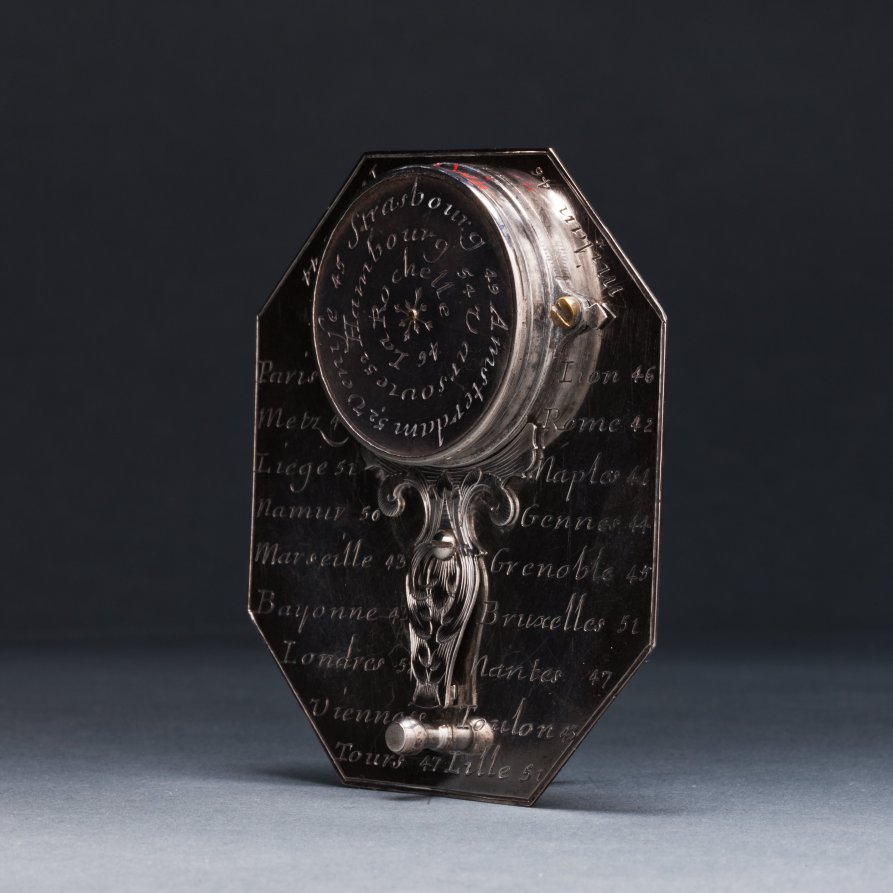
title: Butterfield Sundial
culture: France, 18th century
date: 1700s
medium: silver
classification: Silver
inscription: [Engraved signature above the compass in ribbon band]: "N. BION A Paris"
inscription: [Engraved on the face of the sundial]: “Pour 55° 4-5-6-7-8-9-10-11 50° IIII-V-VI-VII-VIII-IX-X-XI 45° 5-6-7-8-9-10-11 40° -VI-VII-VIII-IX-X-XI'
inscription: [Engraved on the other side]: "Pour 55° -8-7-6-5-4-3-2-1-0 50°-VIII-VII-VI-V-IIII-III-II-I 45°-8-7-6-5-4-3-2-1 40°-VII-VI-V-IIII-III-II-I"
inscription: [Engraved around the compass]: “NORD-OUEST-SUD-EST”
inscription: [Engraved on the back of the sundial]: “Turin 44 Milan 46 Paris 49 Lion 46 Metz 49 Rome 42 Liege 51 Naples 44 Namur 50 Gennes 44 Marseille 43 Grenoble 45 Bayonne 43 Bruxelle 51 Londres 52 Nantes 47 Vienne 48 Toulon 43 Tours 47 Lille 51”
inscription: [Engraved around the back of the compass]: “Venise 45 Strasbourg 49 Amsterdam 52 Hambourg 54 Varsovie 52 La Rochelle 46”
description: Butterfield-type sundials are characterized by their adjustable gnomons, metal flaps that cast a shadow on the dial’s face to indicate the hour, and geographical indices. This sundial has a scale adjustable between latitudes of 40° to 60° north. The latitudes of 26 European towns are engraved on its back for quick reference. With an intricately engraved silver face, it would have functioned as a fashionable traveler’s accessory.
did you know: Butterfield-style sundials were named after Micheal Butterfield, an English scientific and mathematical instrument maker who worked in Paris between 1674 and 1724.